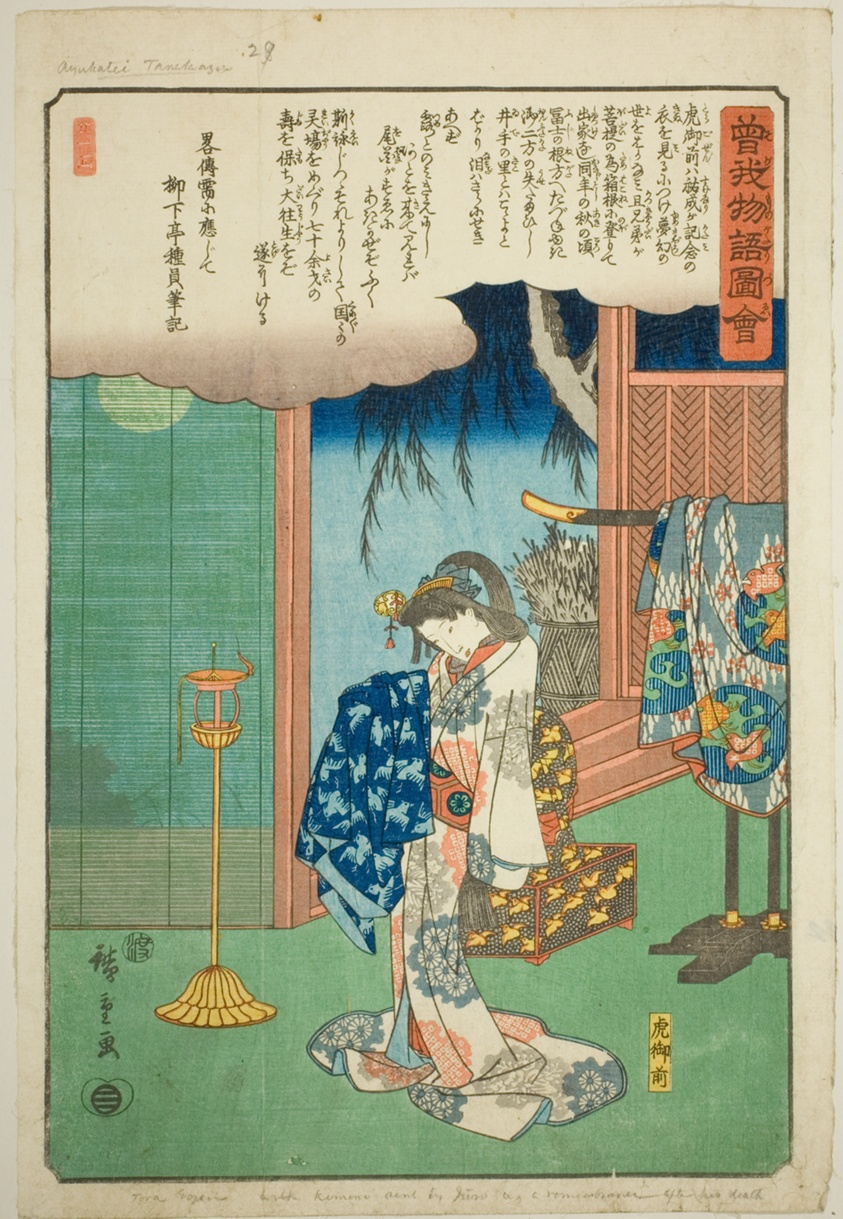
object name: Print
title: Tora Gozen, from the series "Illustrated Tale of the Soga Brothers (Soga monogatari zue)"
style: Japanese (culture or style)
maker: Utagawa Hiroshige 歌川 広重; Japanese, 1797-1858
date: c. 1843/47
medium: Color woodblock print; oban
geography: Japan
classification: woodblock print; print; asian art